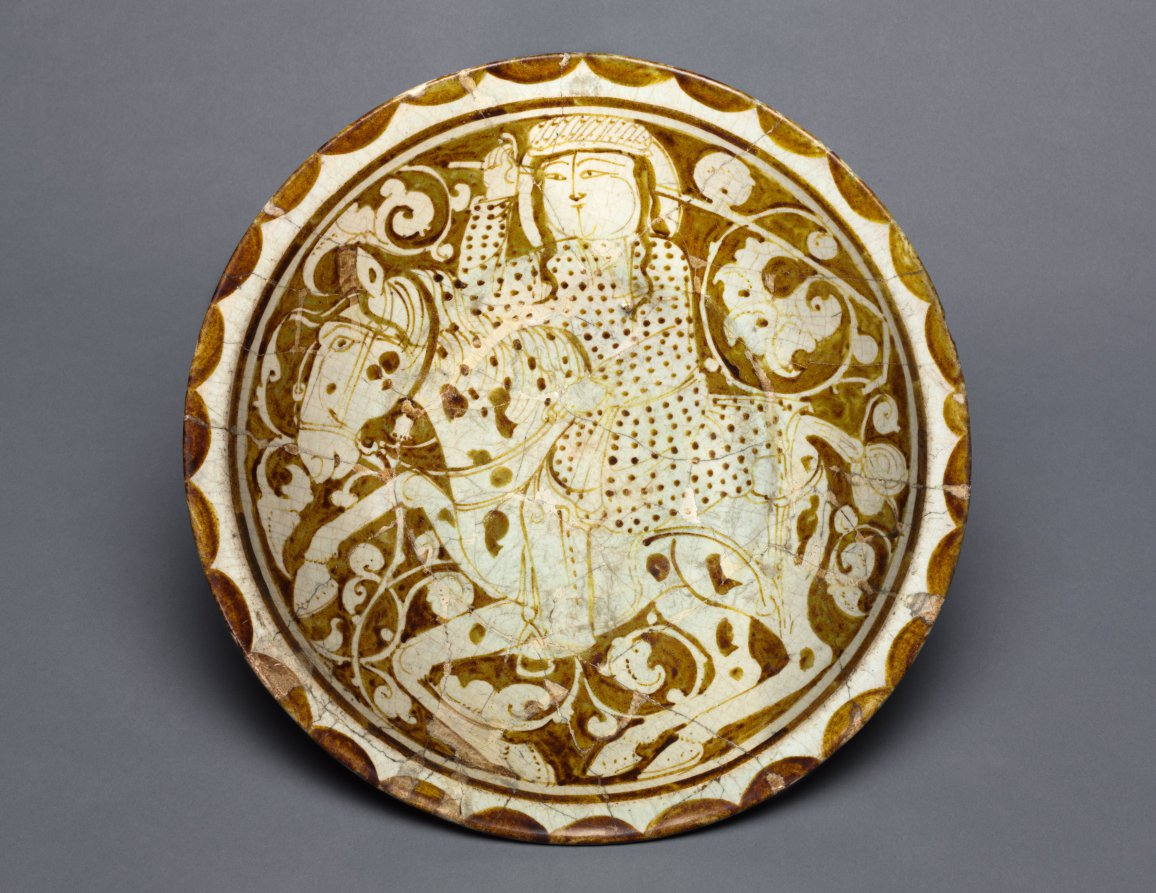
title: Luster Dish with Polo Player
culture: Iran, Seljuq period (1037–1194)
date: 1170–1200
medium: fritware with luster-painted design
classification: Ceramic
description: Luster potters migrated to the city of Kashan in Iran where luster ware reached its greatest height during the 1170s until about 1220. This masterful dish features a mounted polo player, a figure representing the Iranian ideal of beauty with a round moon-like face and fine features.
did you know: Where fine clay was unavailable, potters made a paste out of ground quartz, clay, and glass. When fired, the paste created a compact white material called fritware that approximated the appearance of porcelain.